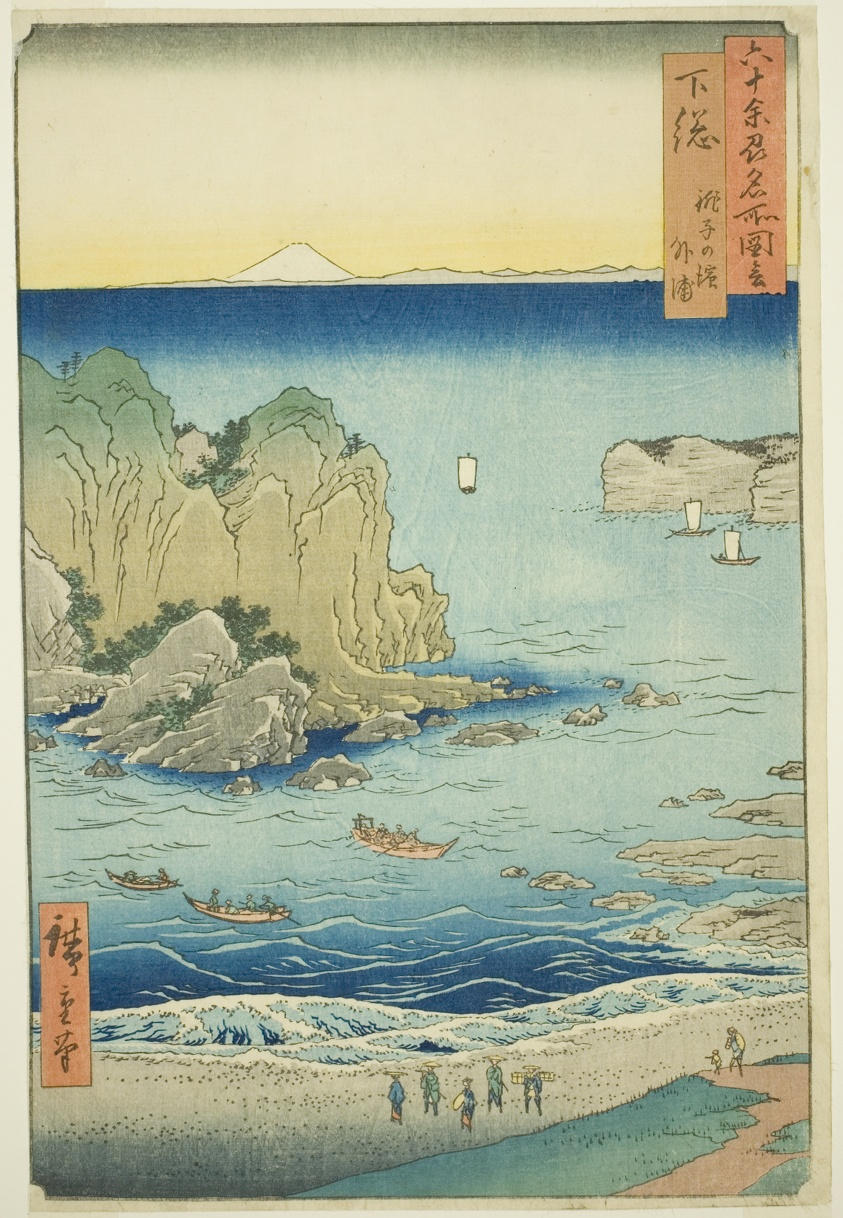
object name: Print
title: Shimosa Province: Choshi Beach on the Outer Bay (Shimosa, Choshi no hama Toura), from the series "Famous Places in the Sixty-odd Provinces (Rokujuyoshu meisho zue)"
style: Japanese (culture or style)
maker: Utagawa Hiroshige 歌川 広重; Japanese, 1797-1858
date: 1853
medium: Color woodblock print; oban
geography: Japan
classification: woodblock print; print; asian art